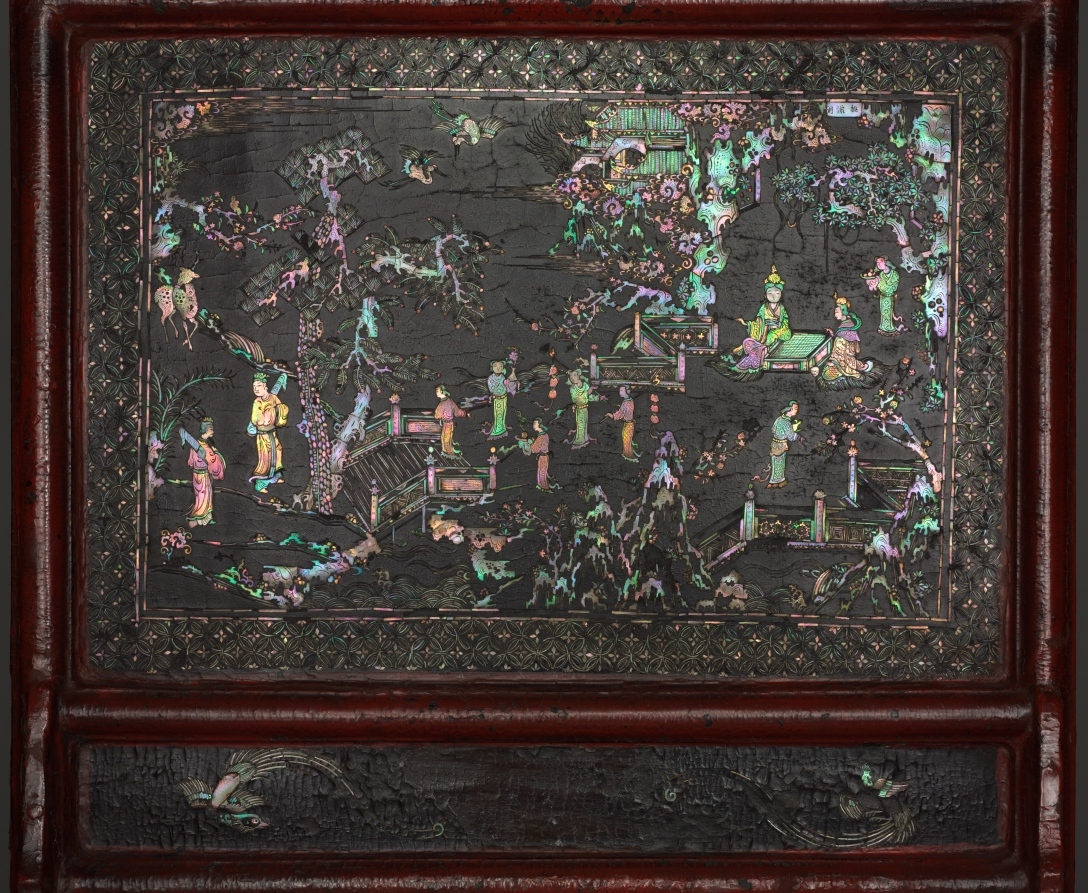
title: Table Screen: The Peach Blossom Spring, Land of the Immortals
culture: China, Yuan dynasty (1271-1368)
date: 1300s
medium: lacquer on wood with mother-of-pearl inlay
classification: Lacquer